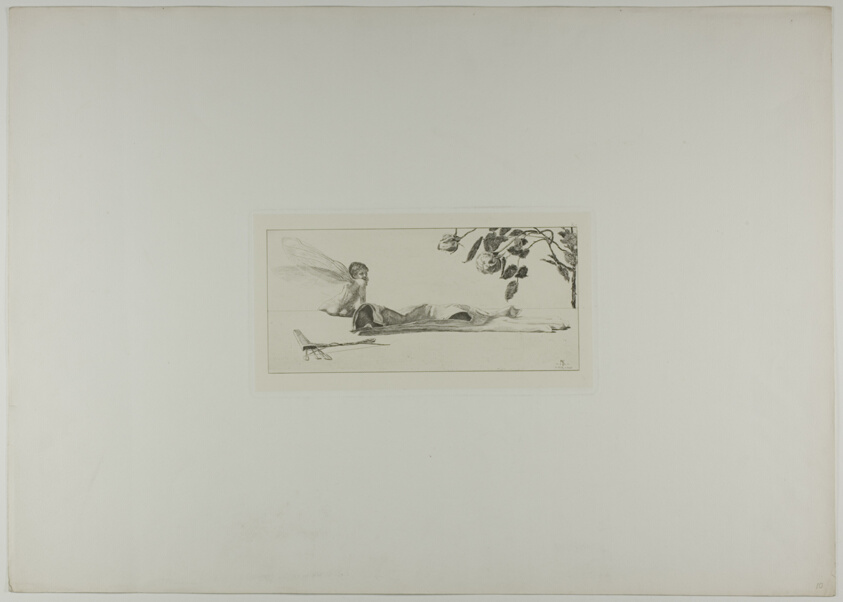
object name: Print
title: Cupid, plate ten from A Glove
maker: Max Klinger (German, 1857-1920)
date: 1881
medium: Etching and aquatint on ivory chine collé on off-white wove paper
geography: Germany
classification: etching; print; prints and drawing